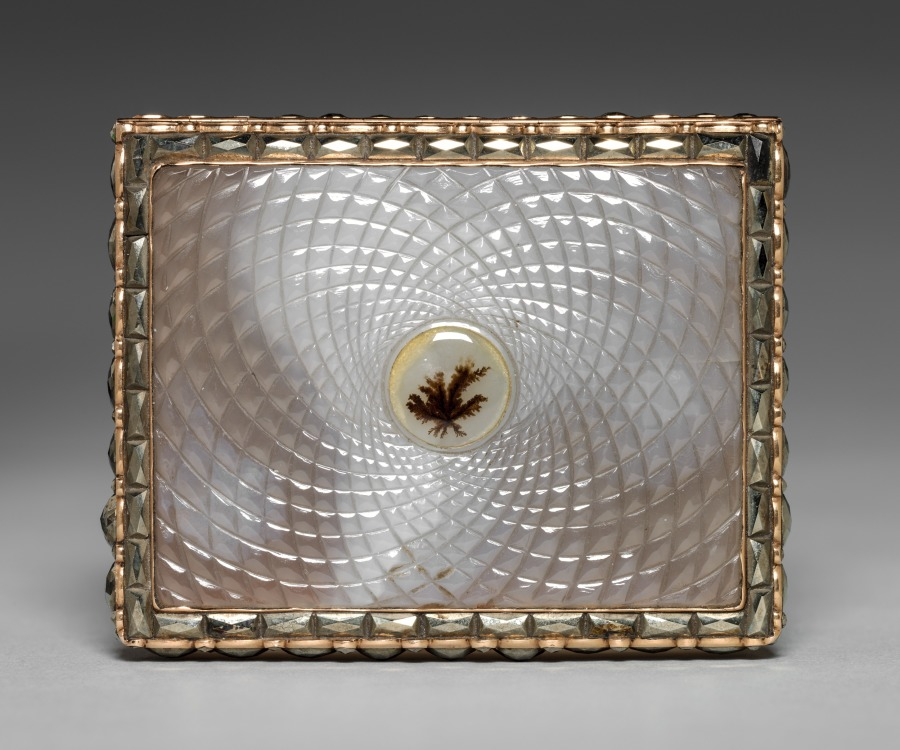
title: Snuff Box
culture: England, London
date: c. 1750–60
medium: gold-mounted agate, engine-turned panels, hematites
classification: Miscellaneous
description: Luxurious personal objects, like this snuff box, were an essential part of a privileged wardrobe during the 1700s and early 1800s, emphasizing their owner’s refinement and wealth. Their glittering surfaces, however, disguised a system based on the labor and suffering of enslaved or indentured people, whether in gold or gemstone mines, tobacco farms, or shops where these goods were made. Like cotton, sugar, and tea, snuff came from British colonies in America, India, and the Caribbean, where enslaved people were exploited to grow these crops under extremely harsh conditions.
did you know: This small, elaborate box held snuff, a form of powdered tobacco that was inhaled in tiny amounts.